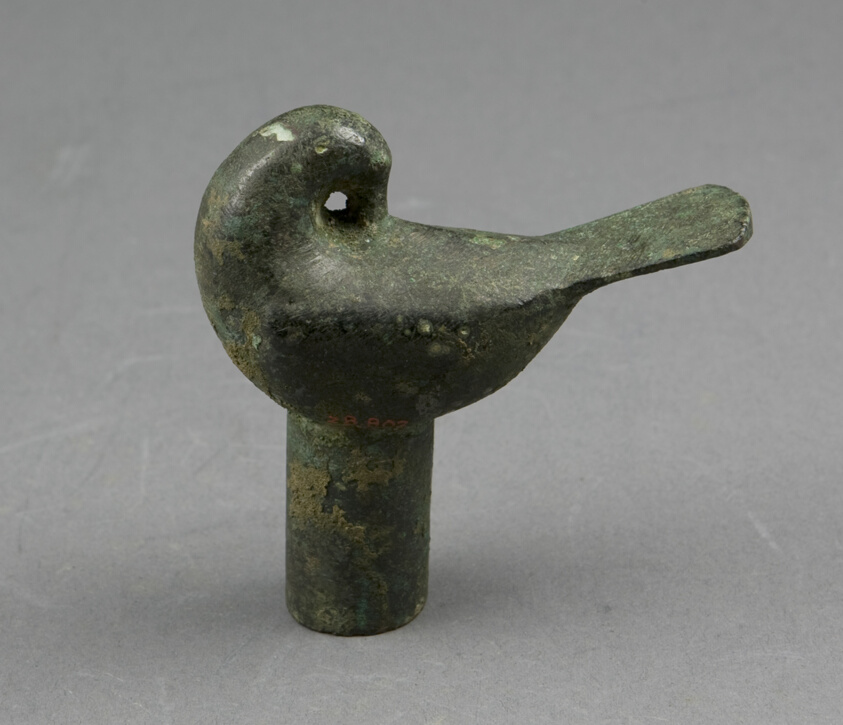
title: Handle for a Lance or Cane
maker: China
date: Han dynasty (206 BC–220 BCE)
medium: Bronze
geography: China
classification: bronze; metal; fitting; asian art